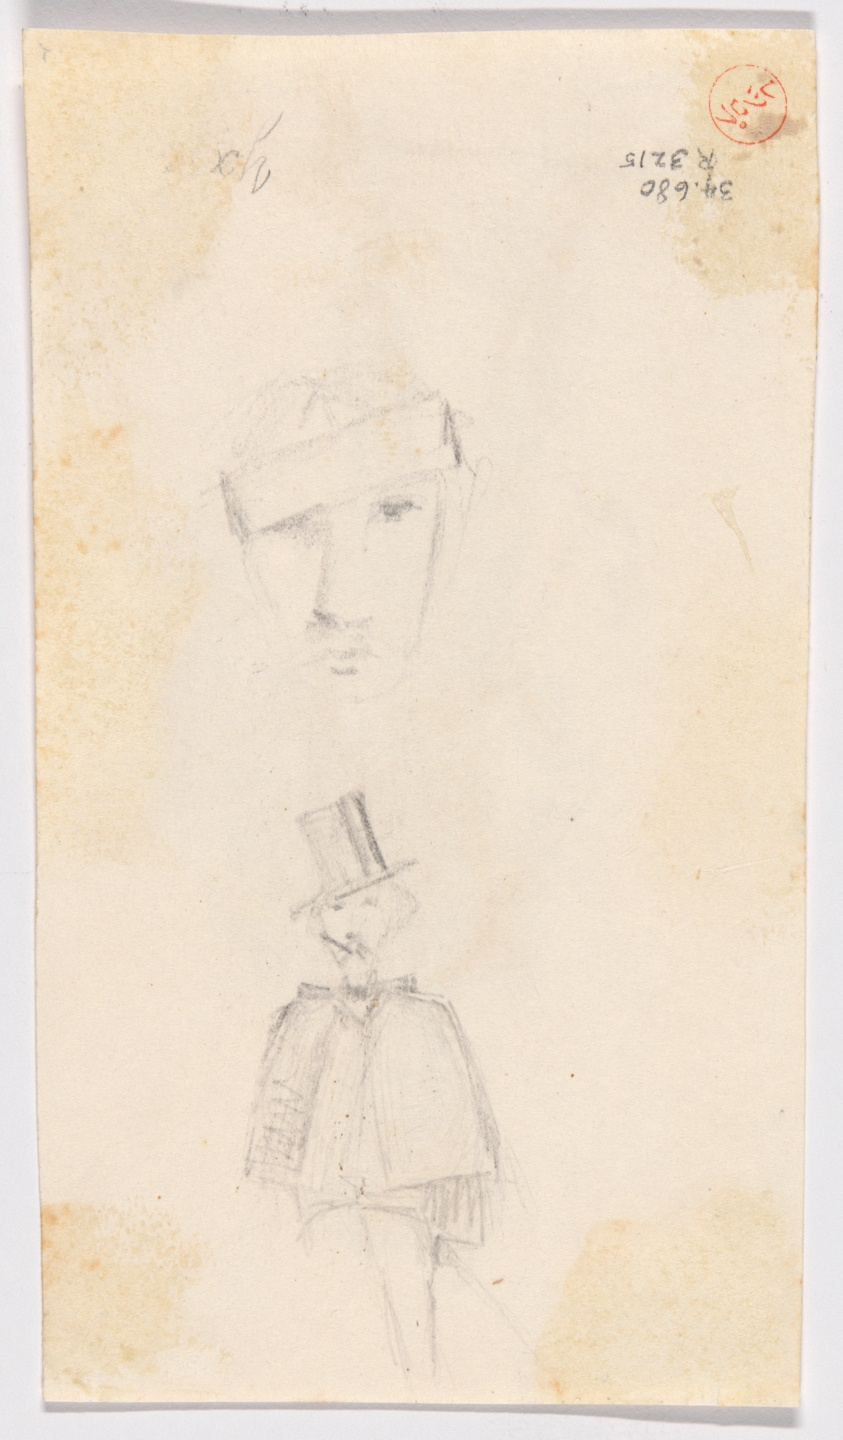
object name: Drawing and Watercolor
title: Hussar (recto) Man with a Top Hat and Bandaged Head (verso)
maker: James McNeill Whistler (American, 1834-1903)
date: 1854/55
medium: Pen and black ink over graphite (recto), and graphite (verso), on cream wove paper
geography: United States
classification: pen and ink drawings; drawings (visual works); prints and drawing; paper